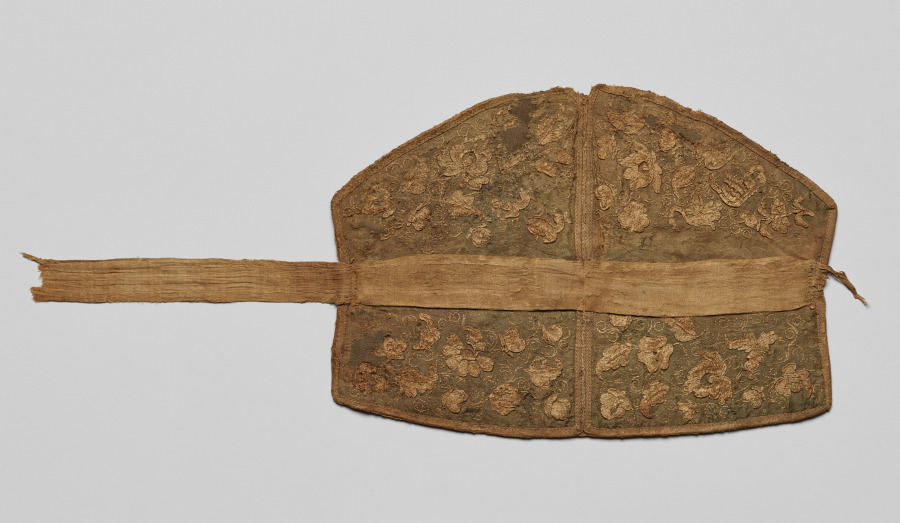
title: Headpiece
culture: China, Liao dynasty (907-1125)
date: 907–1125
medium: embroidery, silk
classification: Embroidery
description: Pair of Headpieces Embroidery; silk Liao Dynasty (907-1125) The Cleveland Museum of Art, Gift of Lisbet Holmes 1995.109.a and 1995.109.b (Cat. no. 52) These headpieces are embroidered with butterflies, birds, animals, flowers, leaves, and delicate vine scrolls. In general, the design is related to the theme of the lotus pond, best known from Liao tomb paintings. Paired ducks or geese swimming in water and looking in opposite directions seem to have become popular in the north of China before spreading further south and to Central Asia. On the other hand, recumbent animals looking back are a Central Asian image that migrated to northern China. Headpieces of this shape, intersected by two bands and secured by ties, have a long history in northern China. A gold replica was found in a tomb dating as early as ad 500-550.